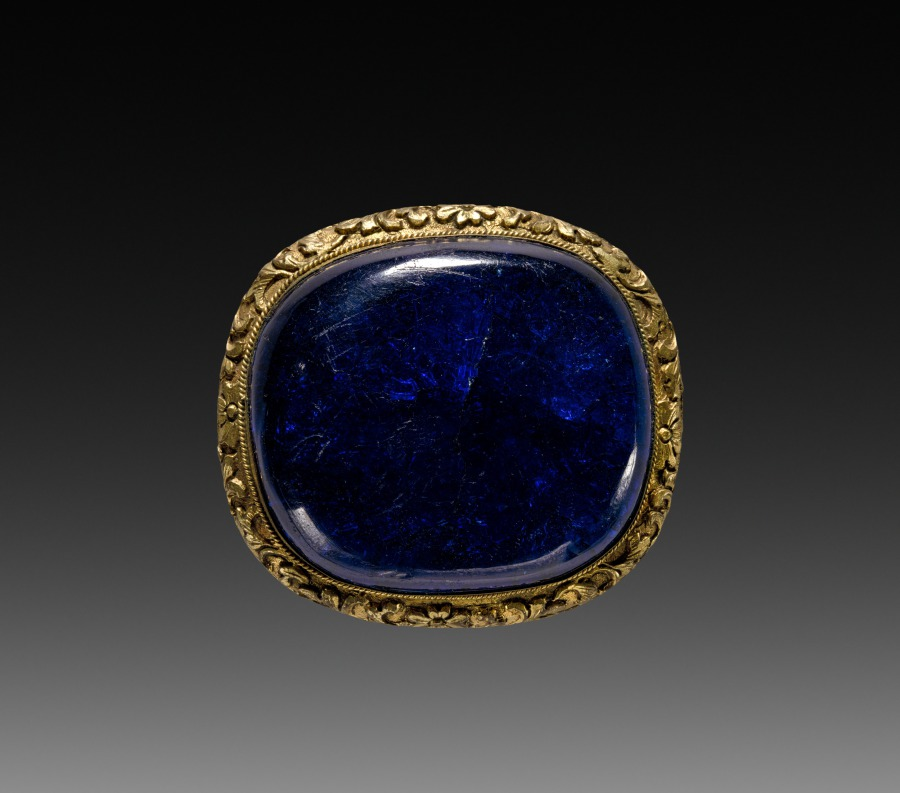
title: Buckle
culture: China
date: 1900s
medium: brass, engraved and set with glass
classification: Jewelry